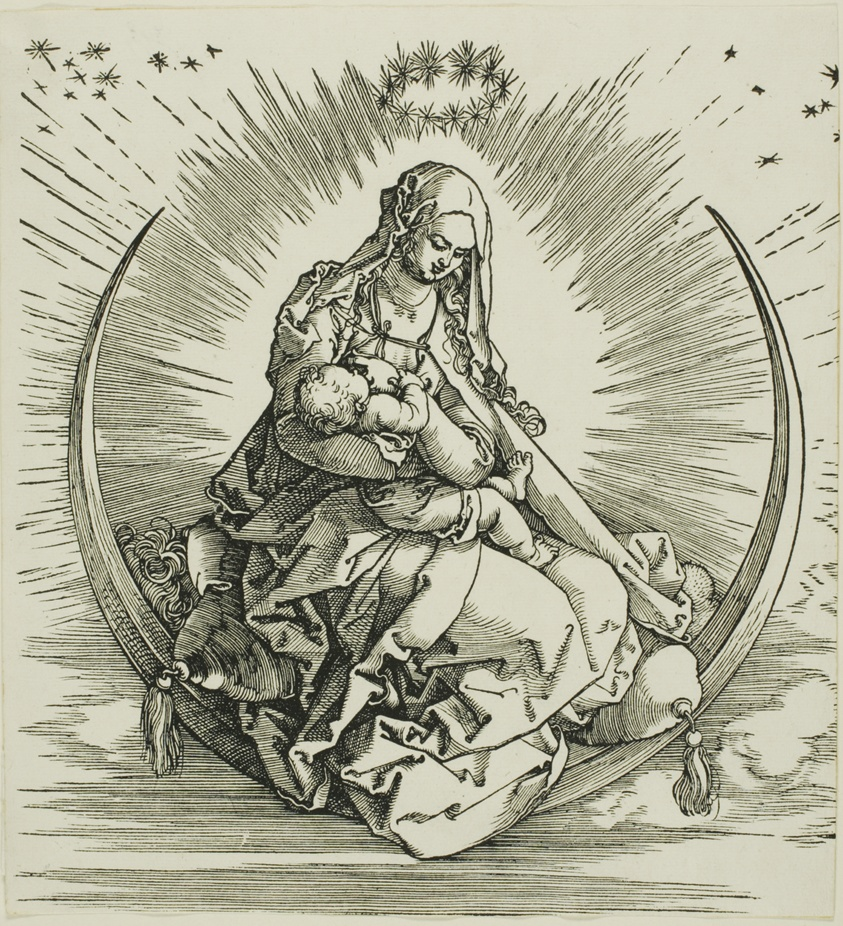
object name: Print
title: The Virgin on the Crescent, from The Life of the Virgin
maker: Albrecht Dürer (German, 1471-1528)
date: c. 1511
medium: Woodcut in black on ivory laid paper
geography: Germany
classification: woodcut; print; prints and drawing; paper